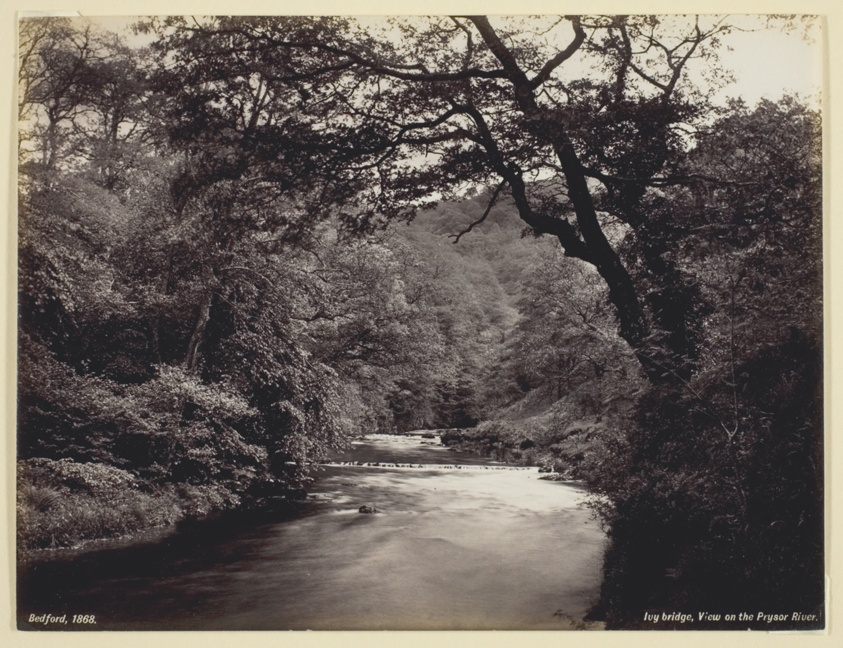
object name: Photograph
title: Ivy Bridge, View on the Prysor River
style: 19th century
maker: Francis Bedford (English, 1816–1894)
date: 1860/94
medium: Albumen print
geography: England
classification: albumen silver print; photographic process; photography; photograph